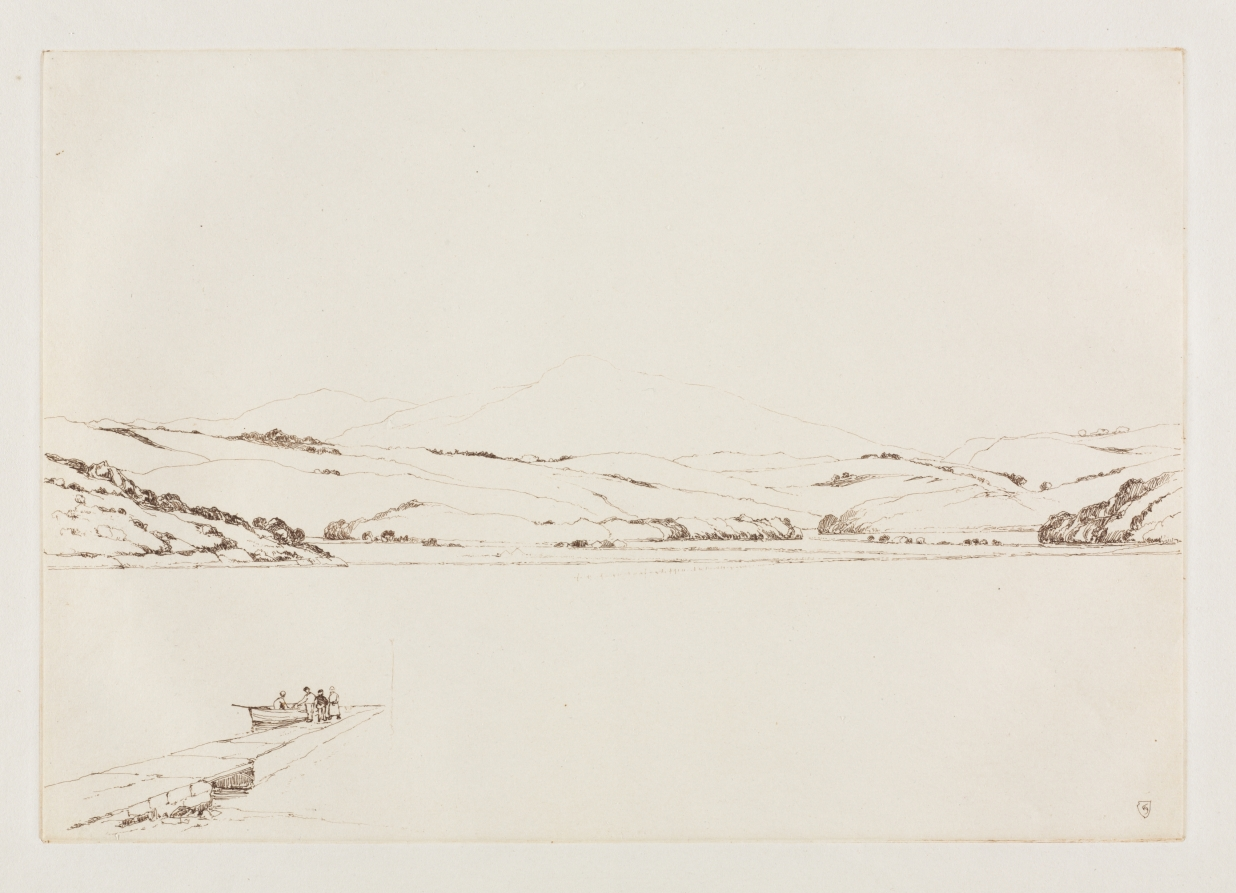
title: Screel Hill and Urr Water from Kypford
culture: England, 20th century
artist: Frank Short (British, 1857–1945)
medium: etching and mezzotint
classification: Print